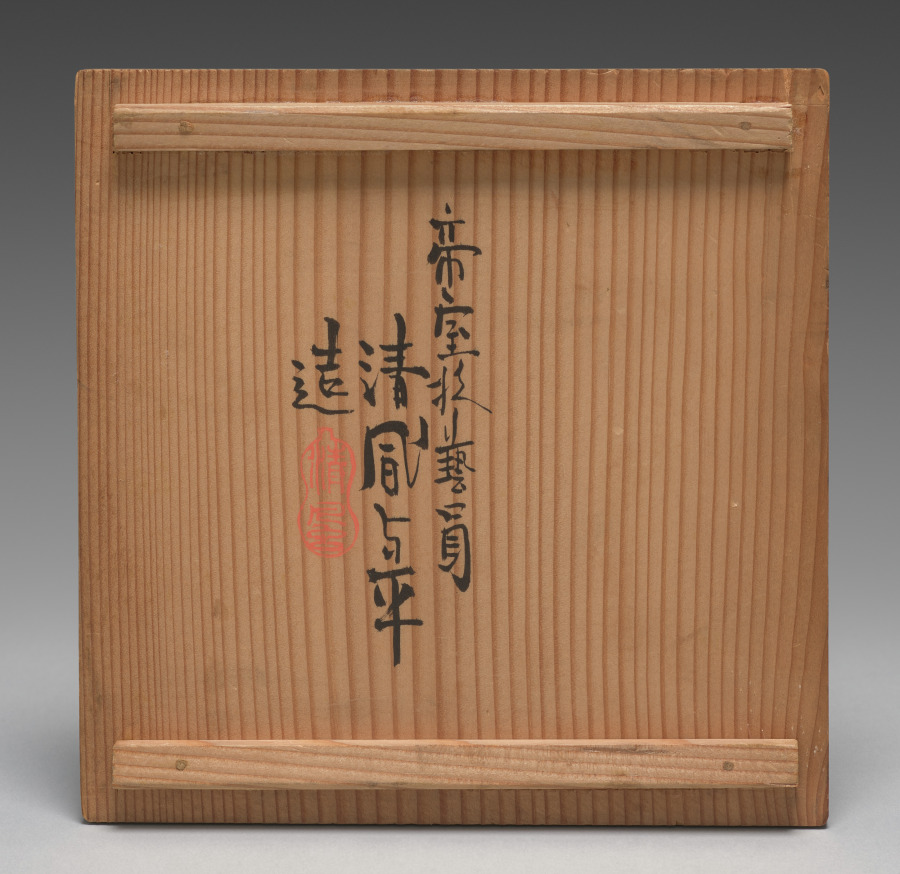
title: Incense Burner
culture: Japan, Meiji period (1868–1912)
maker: Seifū Yohei III (Japanese, 1851–1914)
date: 1895–1914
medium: Porcelain with tea-leaf colored glaze and molded design and geometric openwork silver lid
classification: Ceramic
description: Kyoto-based Japanese ceramist Seifū Yohei III (1851–1914) admired the glaze colors found on Chinese porcelain and tried to replicate them through intensive experimentation. His green and creamy white glazes were particularly well received. The combinations of colors with subtle molded and incised decorations in his ceramics respond powerfully to changes in light, creating a dynamic viewing experience. Names for the glazes, written in ink with a brush on the lids of the custom-made storage boxes for the works, often indicate a specific glaze or ware that had inspired him, even when the resulting color was distinctively his own.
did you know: This incense burner with a geometric-patterned silver lid has a glaze identified on its box lid as “tea leaf [color–glazed] porcelain” (chayōji).